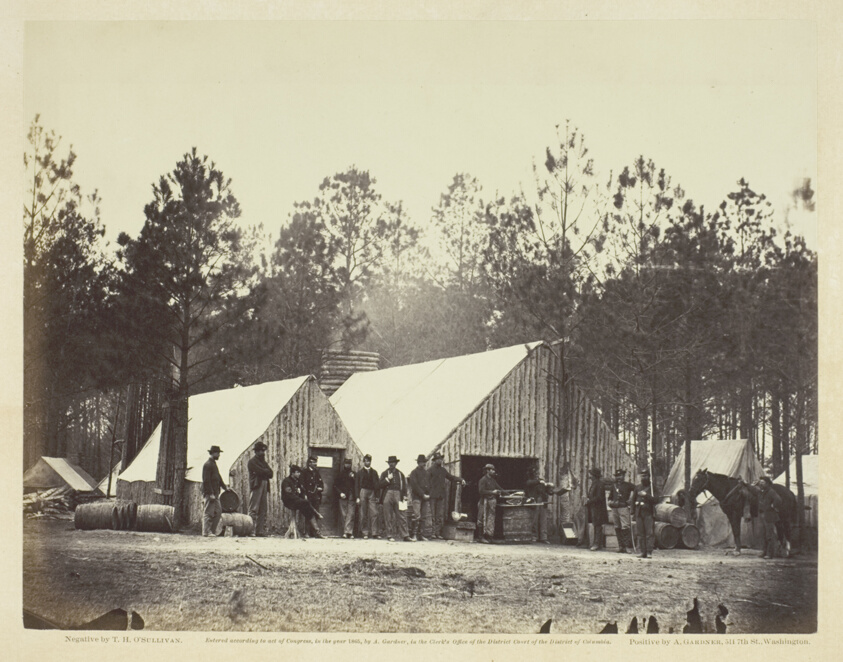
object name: Photograph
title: Commissary Department, Head-Quarters Army of the Potomac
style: 19th century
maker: Timothy O'Sullivan (American, born Ireland, 1840–1882)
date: February 1864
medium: Albumen print, pl. 61 from the album "Gardner's Photographic Sketch Book of the War, Volume II" (1866)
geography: United States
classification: photograph; albumen silver print; photography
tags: Collected by Hugh Edwards, Gardner's Photographic Sketch Book